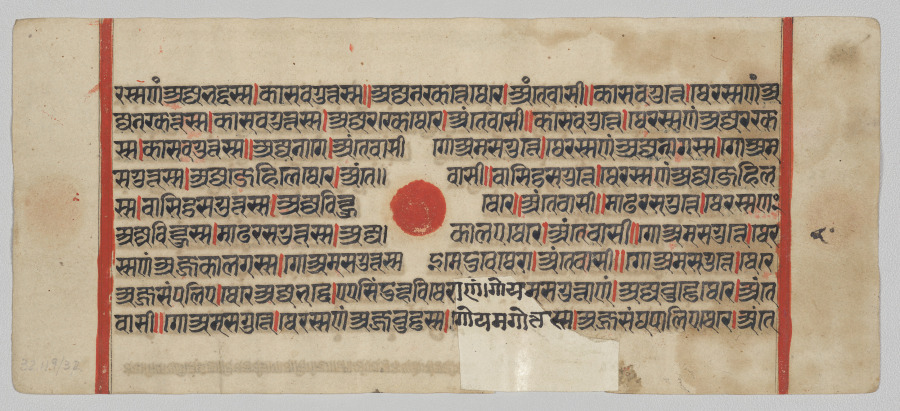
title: Text, Folio 65 (recto), from a Kalpa-sutra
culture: Western India, Gujarat, last quarter of the 15th century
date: c. 1475–1500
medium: Gum tempera, ink, and gold on paper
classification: Painting